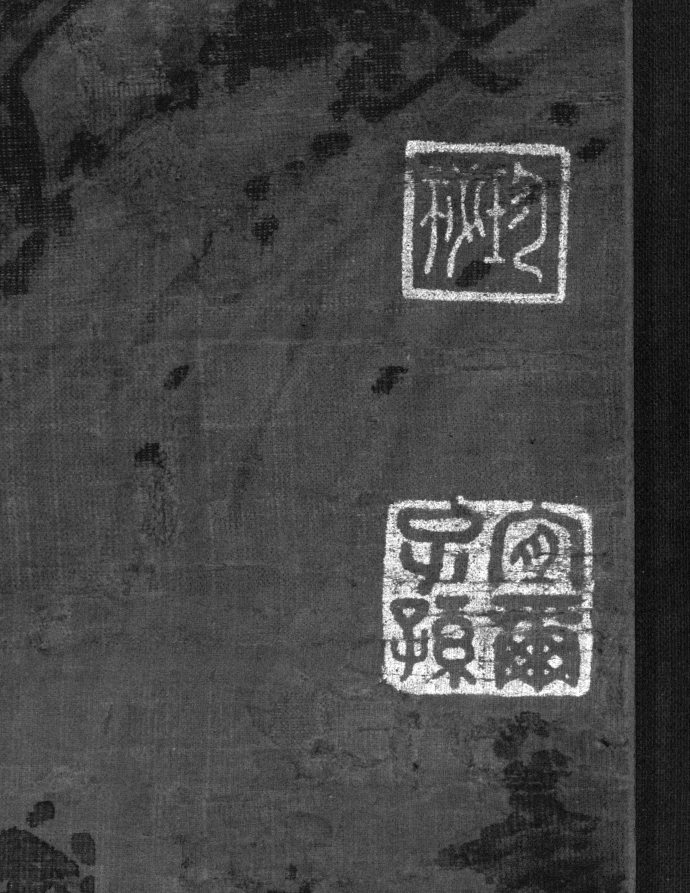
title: Summer Mountains (after Dong Yuan [active c. 937–75])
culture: China, Yuan dynasty (1271-1368)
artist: attributed to Huang Gongwang (Chinese, 1269–1354)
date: 1290–1354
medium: hanging scroll; ink and slight color on silk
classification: Painting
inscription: 【印】一峰道人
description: This monumental landscape is drawn in softly rounded strokes with darker lines frequently applied on top of lighter ones. This technique recalls one of the suggestions included in a collection of the artist's writings known as Secrets of Landscape Painting: The most difficult thing in painting is using the ink. The artist begins by using dilute ink and builds it up to the point where it begins to look right, then uses dense, black ink, applied fairly dry, and washes of deeper-toned ink. This technique distinguishes the fields from the paths, the far from the near. Huang Gongwang may have learned this technique from observing nature through the eyes of an earlier master, Dong Yuan, a painter whose style he shared.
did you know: The wet hills and moist, rich atmosphere evoke the southern Chinese summer, characterized by monsoon rains and lush growth.